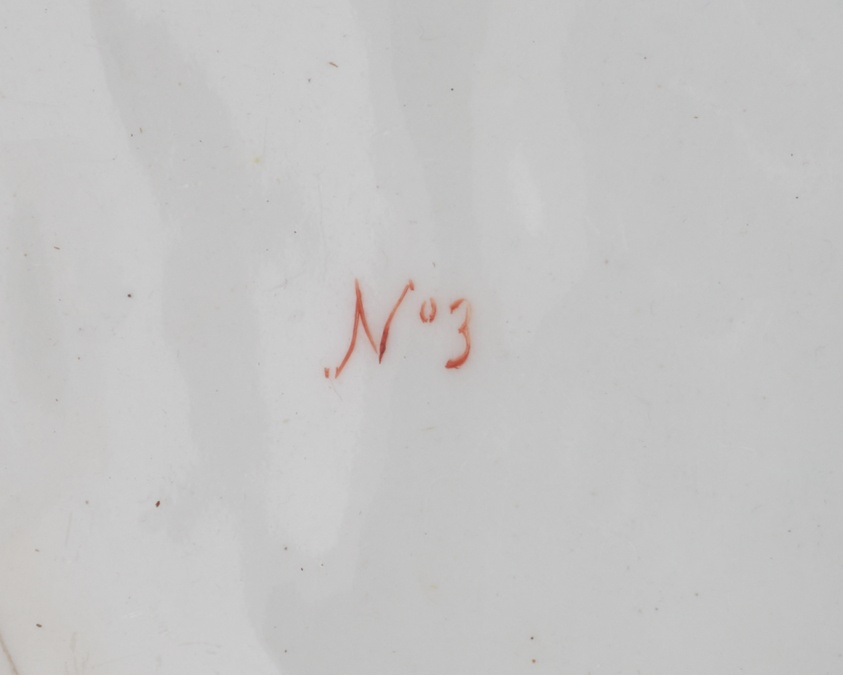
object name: Ceramics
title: Tureen in the form of a Rabbit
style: Rococo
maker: Chelsea Porcelain Manufactory; English, c. 1745–1784; London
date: 1755–56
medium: Soft-paste porcelain and polychrome enamels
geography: Chelsea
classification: tableware; porcelain; european decorative arts; ceramics